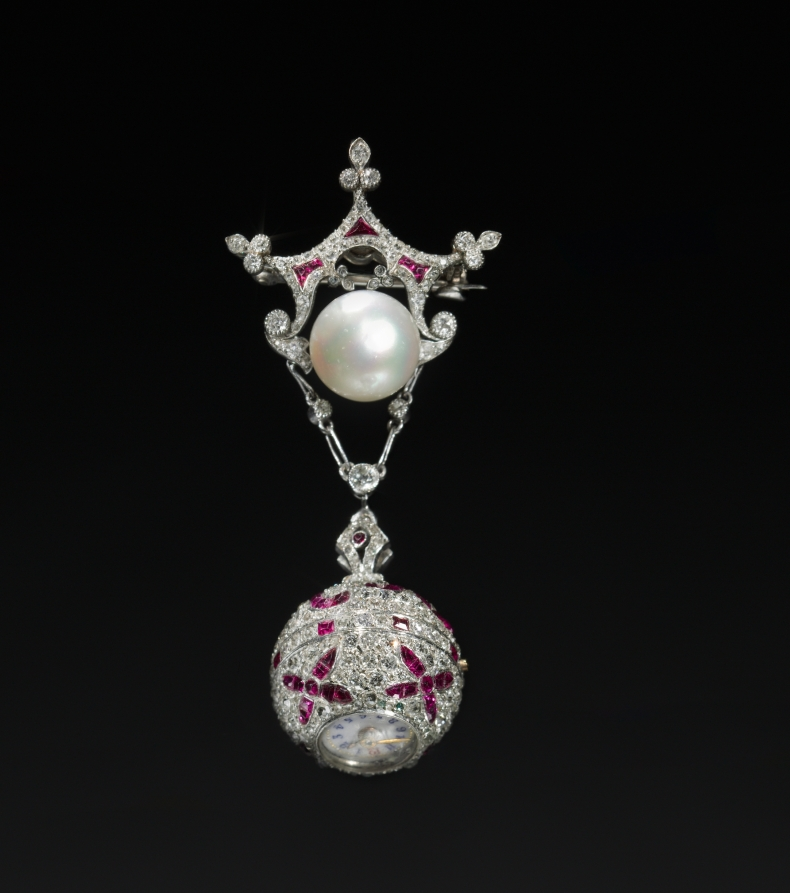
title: Pendant Watch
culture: America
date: c. 1890–1910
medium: diamonds, rubies, pearl, gold, platinum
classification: Jewelry